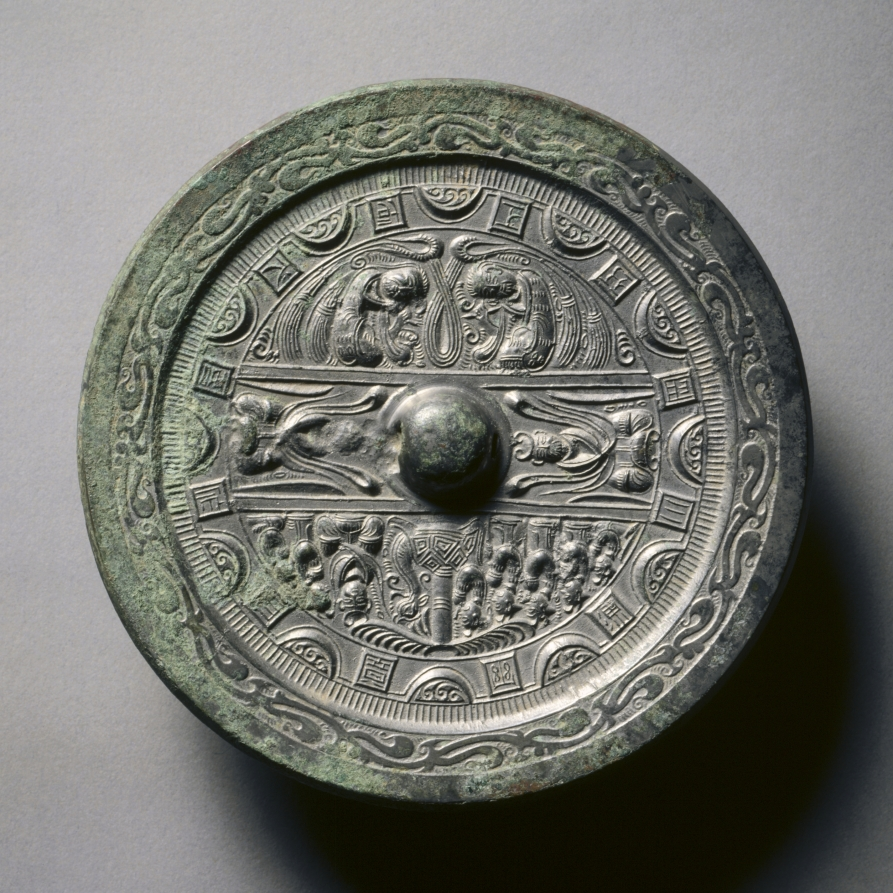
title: Mirror Featuring Deities and Kings in Three Sections Surrounded by Rings of Squares and Semicircles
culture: China, Eastern Han dynasty (25–220 CE)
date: 175–225 CE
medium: bronze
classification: Metalwork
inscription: 吾作明鏡，幽涑三岡。巧工刻之。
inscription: 余造明【鏡】，【】【】能容 。翠羽秘蓋， 靈鵝臺【】。雕刻神圣，西母東王。 堯帝賜舜二女，天下泰平...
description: Inscription: I made this bright mirror By refining the three metals. With my fine skill, I engraved [the design].